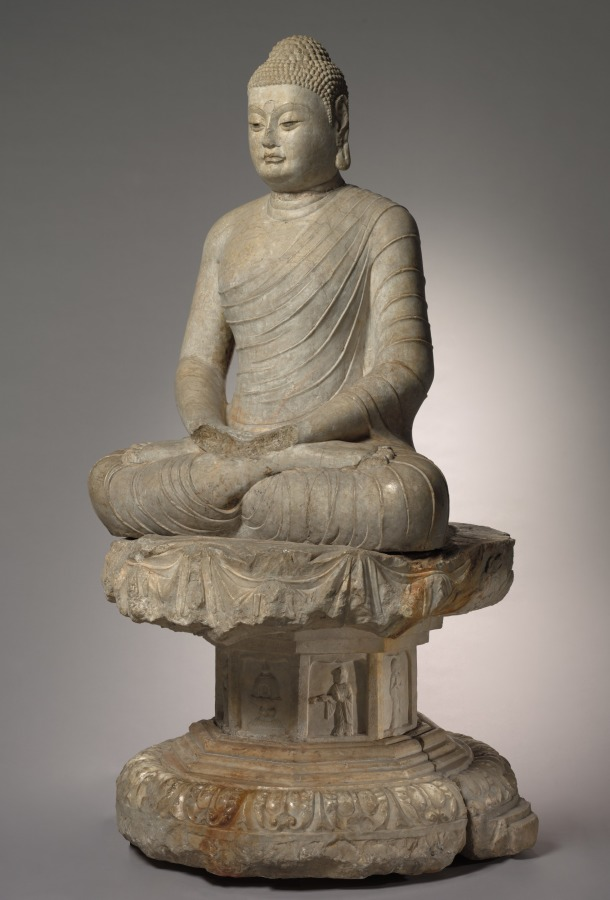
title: Fang Xuanling Pedestal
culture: China, Tang dynasty (618-907)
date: 647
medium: marble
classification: Sculpture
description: This double lotus pedestal exhibits the rich, ornate style of early Tang sculpture. It was commissioned by the Duke of Liang, Fang Xuanling (578–648), for the blessing of his second son and daughter-in-law, the Tang imperial princess of Gaoyang. The iconography and inscription suggest that it originally went with a statue, now missing, of Shakyamuni, the historical Buddha, instead of Amitayus. Today the pedestal is topped with Amitayus, the Buddha of Infinite Life, seated in meditation. Although the pedestal was not made with the statue, the combination is faithful to the original artistic conception.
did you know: In front, the top layer of the pedestal has an abstract curvilinear motif suggesting drapery; the rear is carved with a flower-and-leaf motif.